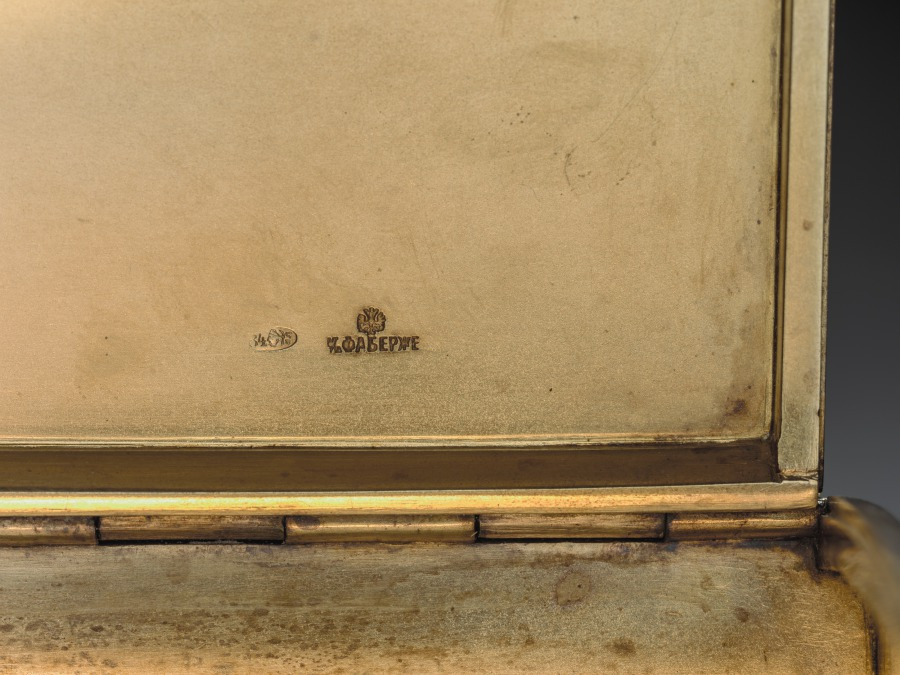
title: Cigar Box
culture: Russia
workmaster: attributed to Feodor Ivanovich Rückert (Russian, 1840–1917)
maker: House of Fabergé (Russian, 1842–1918)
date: c. 1896–1908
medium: Silver gilt, enamel, sapphire set in gold; [reproduction silk tinder cord, gold and moonstone catch]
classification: Silver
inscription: C. Fabergé (in Cyrillic); double-headed eagle [imperial warrant]; 84, Kokoshnik, tester's initials [assay mark for Moscow, 1896-1908]; scratched 16358.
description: Fabergé’s craftsmen in Moscow became known for their work in the pan-Slavic or neo-Russian taste, hearkening back to 17th-century styles of Russian folk decoration. In this whimsically oversized box for cigars or loose tobacco, Fabergé used the technique to highlight a symbol of imperial royalty, the preening peacock, here rendered in brilliant hues of blue and green enamels.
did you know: Peacocks were considered a symbol of imperial royalty in Russia.